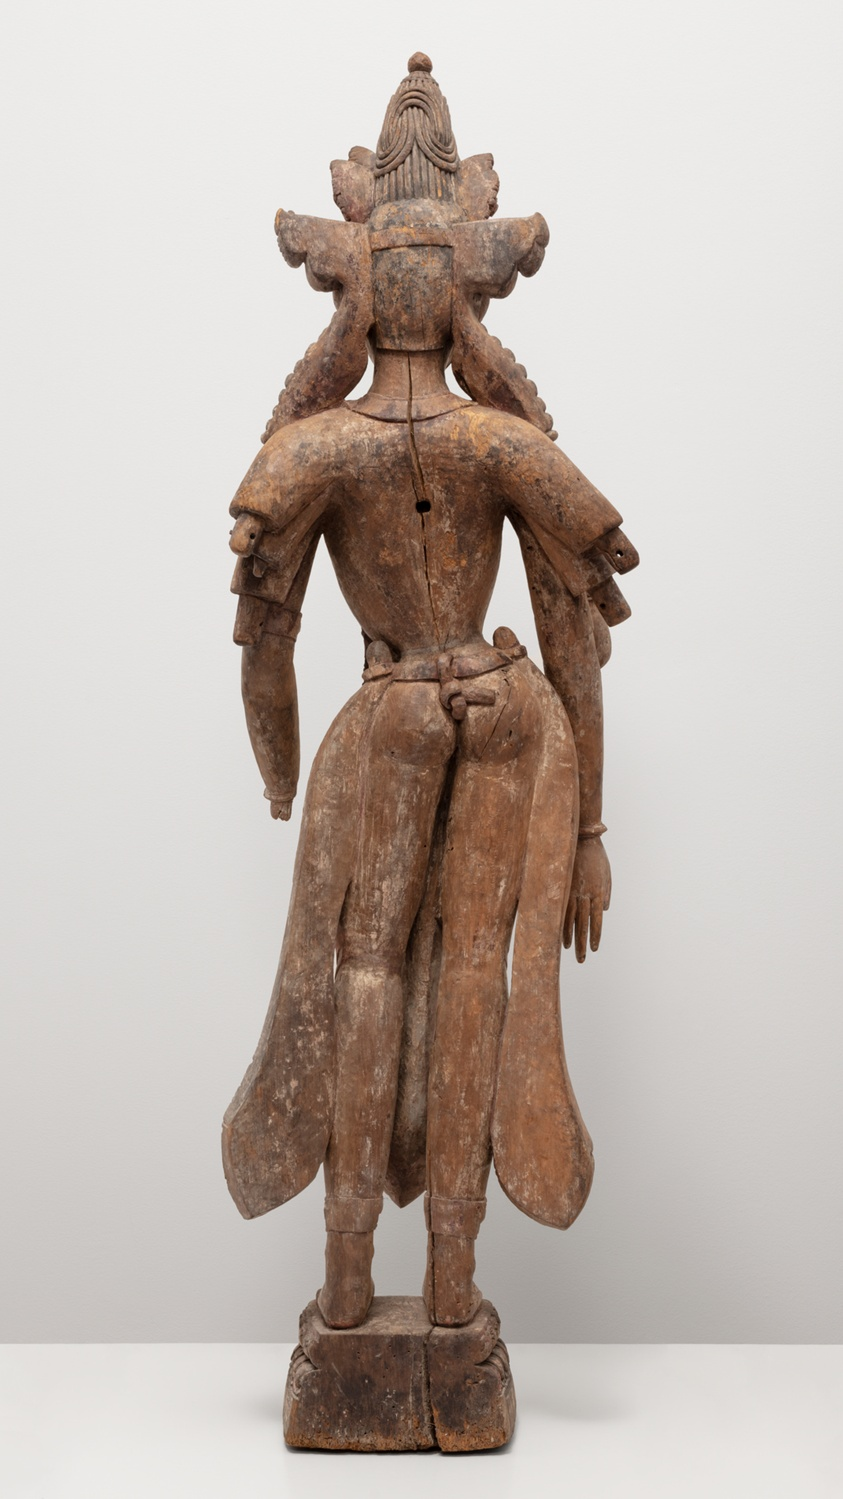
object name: Sculpture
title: Bodhisattva Amoghapasha Lokeshvara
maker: Nepal; Kathmandu Valley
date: 15th century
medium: Painted wood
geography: Kathmandu Valley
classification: wood; sculpture; asian art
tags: religion, bodhisattva, Buddhism